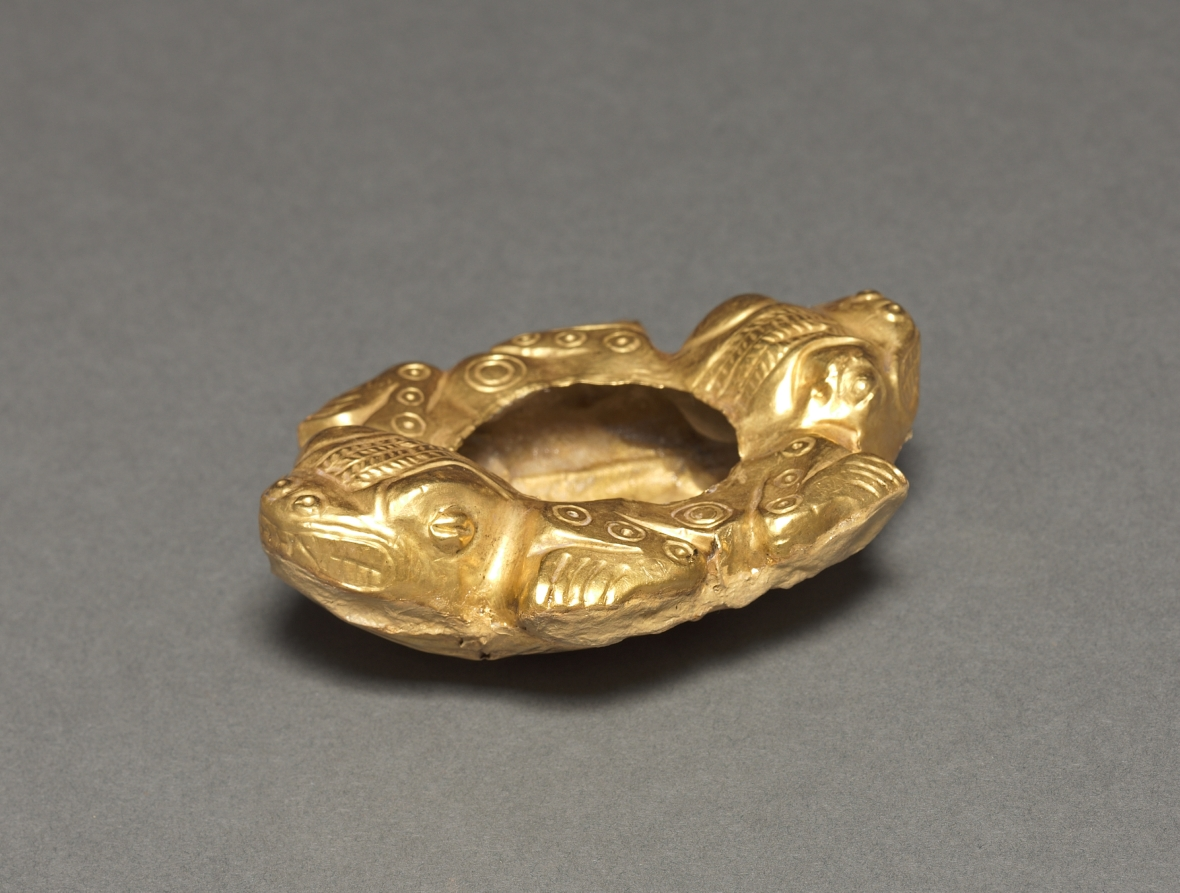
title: Double Crocodile Vessel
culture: Central Panama, (Sitio Conte?), Conte Style, 5th-10th Century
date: c. 400–900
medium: hammered and embossed gold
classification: Metalwork